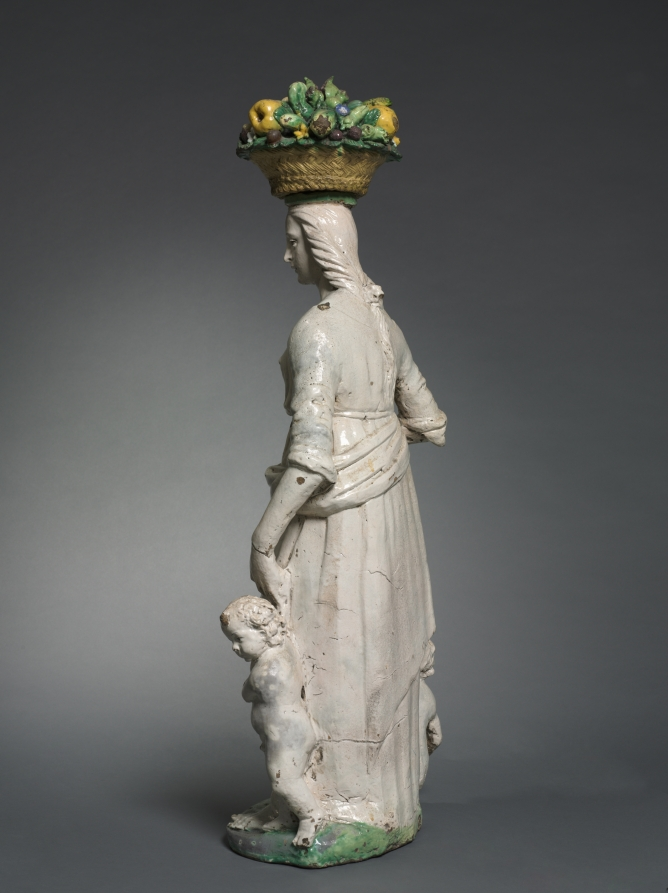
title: Dovizia (Plenty)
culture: Italy, Florence, 16th century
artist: Giovanni della Robbia (Italian, 1469–1529/30)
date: c. 1520–29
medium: glazed terracotta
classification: Sculpture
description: Many elite Florentine Renaissance homes had sculptures of idealized young women carrying nature’s bounty, such as this work. The motif stems from a statue by Donatello (about 1386–1466) that towered over Florence’s main public market. At home, however, the sculpture became a talisman for the family’s well-being. The city-state’s low birth rate was a serious political matter, and such a sculpture was believed to stimulate fertility while also promoting motherhood and bolstering financial success.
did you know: Inspired by an over life-sized, public sculpture by Donatello, Giovanni della Robbia reduced the figure for a domestic setting.